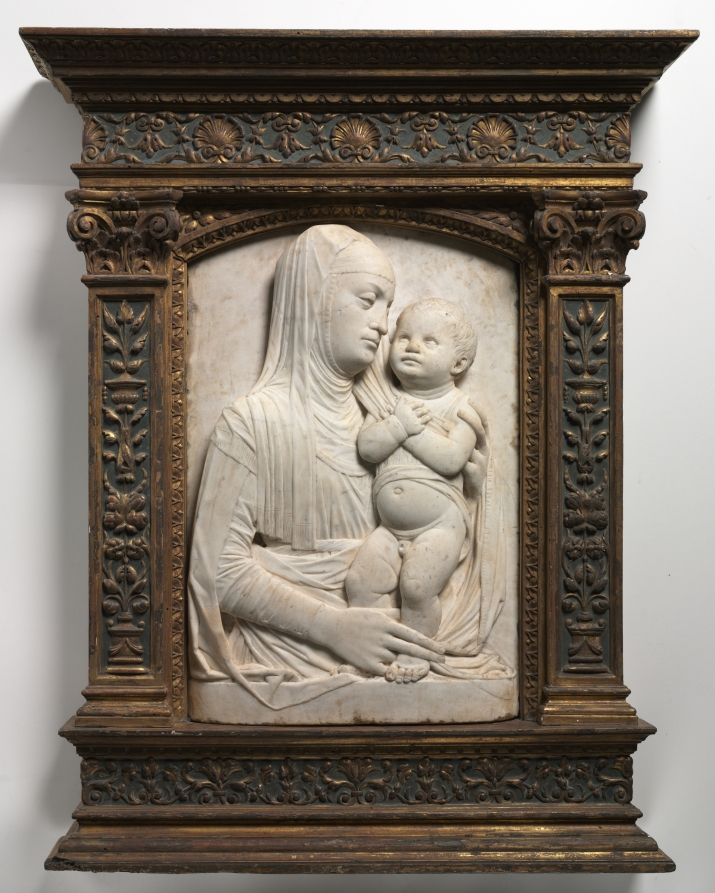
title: Virgin and Child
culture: Italy, Venice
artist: workshop of Pietro Lombardo (Italian, c. 1435–1515)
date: c. 1475–1485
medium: marble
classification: Sculpture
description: In the later 1400s, artists increasingly infused sacred subject matter with a classical vocabulary. The shallow relief and simplified forms ultimately stemmed from ancient sculpture, bringing gravity as well as novelty to a conventional theme. Yet naturalistic elements such as the baby’s bulging navel, chubby wrists, and shirt pulled up to reveal his genitals all humanize Christ, a critical principle of Christian dogma.